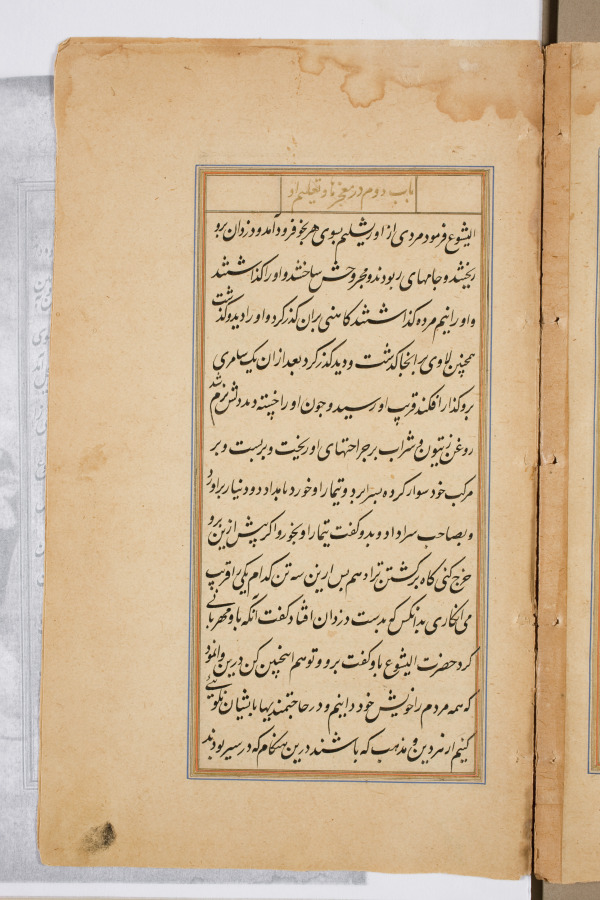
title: Text page from a Mirror of Holiness (Mir’at al-quds) of Father Jerome Xavier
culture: Mughal India, Allahabad, made for Prince Salim (1569–1627)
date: 1602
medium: Ink and gold on paper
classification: Manuscript